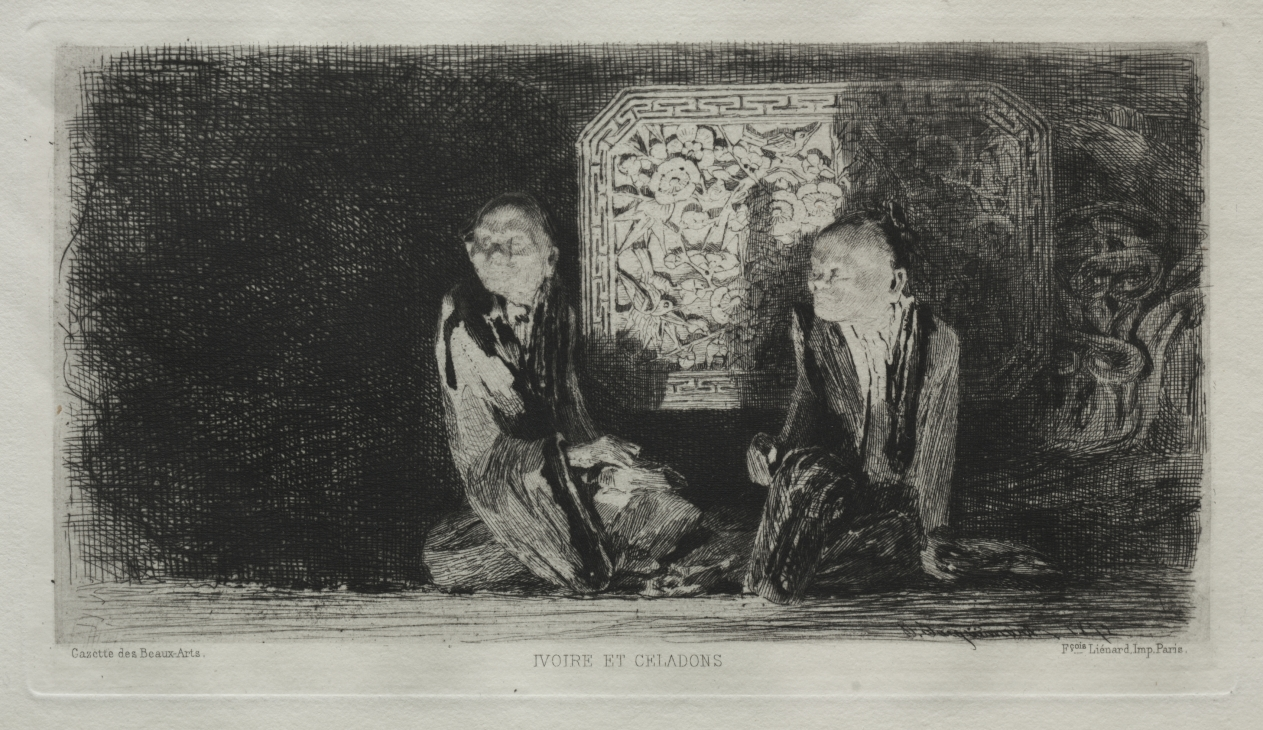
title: Ivory and Celadon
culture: France, 19th century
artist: Jules Jacquemart (French, 1837–1880)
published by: Gazette des Beaux-Arts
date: 1872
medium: etching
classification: Print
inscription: lower right, in plate: J. Jacquemart